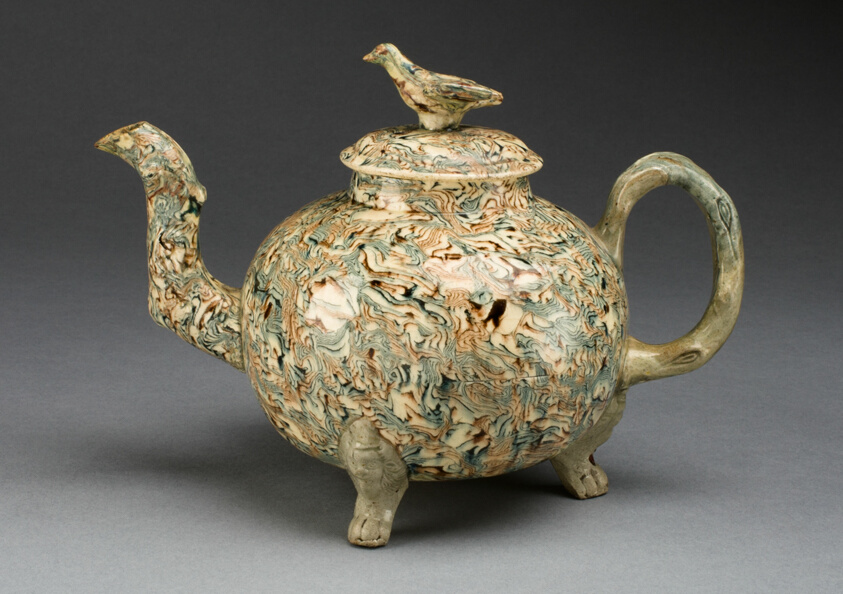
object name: Ceramics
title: Teapot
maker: Staffordshire, England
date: c. 1760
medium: Lead-glazed earthenware (agateware)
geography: Staffordshire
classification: teapot; lead-glazed earthenware; ceramics; earthenware; european decorative arts; agateware